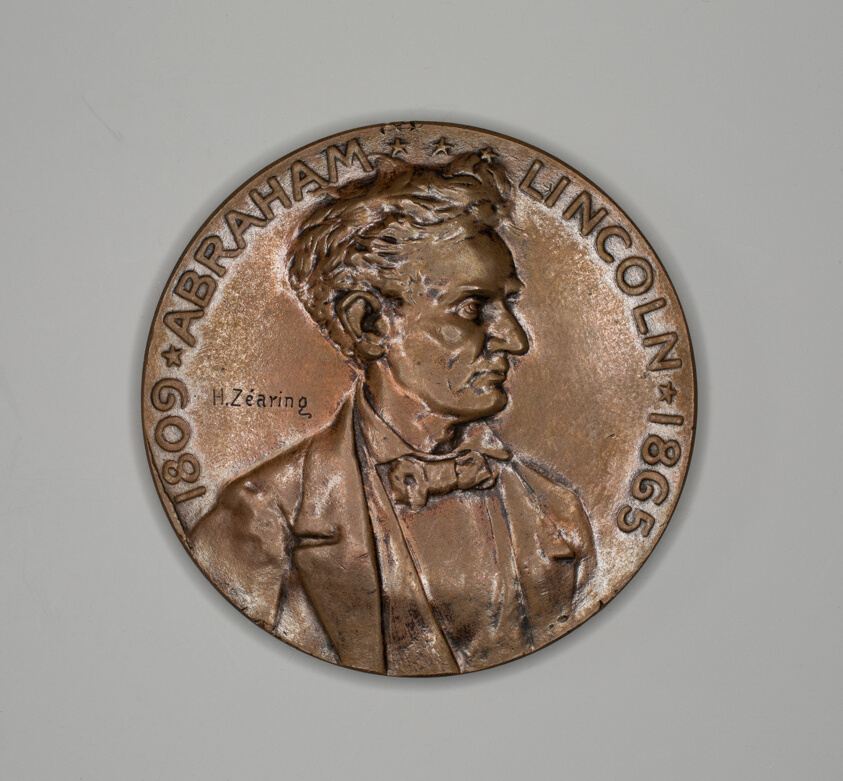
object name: Metalwork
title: Three Medals Depicting Lincoln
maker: Artist unknown (American, 19th century)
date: 1865–94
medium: Bronze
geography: United States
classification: medal; american arts; decorative arts